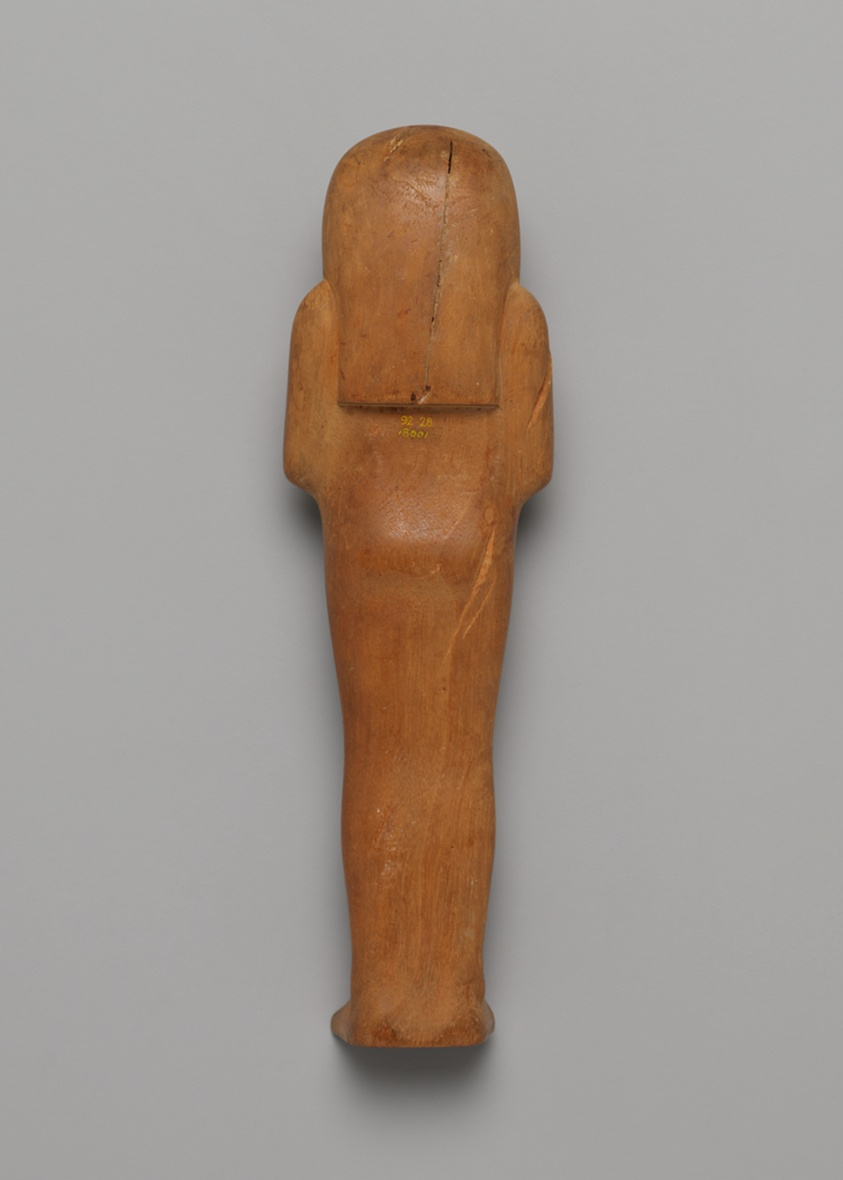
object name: Funerary Object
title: Shabti (Funerary Figurine) of Nebseni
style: new kingdom, eighteenth dynasty, ancient, egyptian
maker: Egyptian; Thebes (modern Luxor), Egypt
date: New Kingdom, early Dynasty 18, about 1570 BCE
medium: Wood (tamarisk) and pigment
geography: Egypt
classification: ushabti; wood; figurine; funerary; ancient art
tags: mummies, Hieroglyphs, figurines, writing